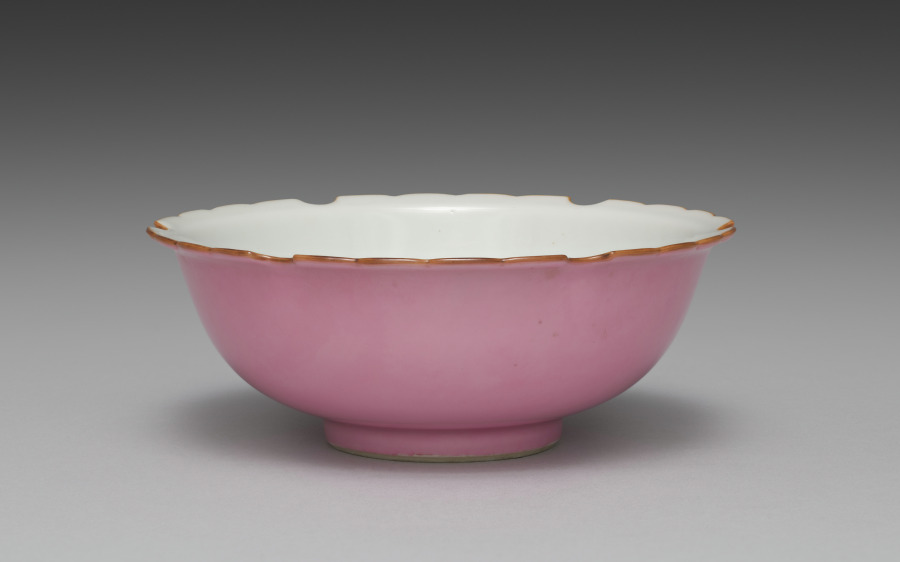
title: Dish from Snow-Flake Side Dishes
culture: Japan, Meiji period (1868–1912)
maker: Seifū Yohei III (Japanese, 1851–1914)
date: 1893–1914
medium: One from a set of six porcelain dishes; porcelain with lobed rims and pink glaze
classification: Ceramic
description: According to the box lid, this set of six side dishes, or mukōzuke, are “snow-flower style” (sekkashiki), having mouths shaped like snowflakes. Their mouths, which have six lobes and scalloped edges, are traced with brown iron oxide at the rim. The outside of each bowl is glazed with a very bright pink over the basin and foot, and the inside is left white. From directly above, one sees a snowflake-like shape, and from the side, they seem to float above a rosy ground.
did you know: The box for this set of dishes has an inscription on the side noting that they were for a person with the family name Nakamoto.